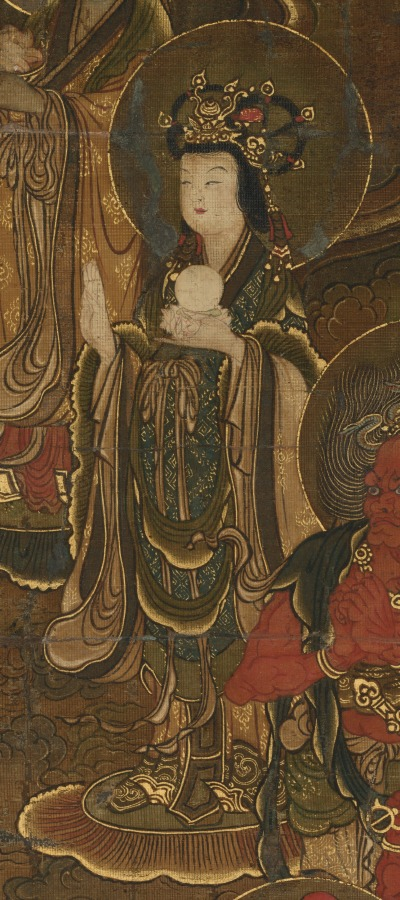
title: Descent of the Nine Luminaries and the Seven Stars at Kasuga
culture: Japan, Nanbokuchō period (1336–92)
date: mid- to late 1300s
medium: Hanging scroll; ink, color, gold and cut gold on silk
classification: Painting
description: This medieval religious painting shows celestial beings descending from the heavens into the Kasuga Shrine, a major religious site in Japan's ancient capital, Nara. The moon and the Kasuga mountain range appear in the uppermost portion of the painting, as does a red shrine entrance gate, or torii. In the upper part of the painting, figural representations of the stars in the constellation known as the Big Dipper in the West descend from right to left on cloud banks. In the lower part, the Nine Luminaries (Sanskrit: Navagraha) that emerged from the Vedic tradition—the sun and moon; the planets Jupiter, Mars, Saturn, Venus, and Mercury; and personifications of the fluctuating lunar nodes—descend in similar fashion. The painting uses the "deities in descent" scheme originating in China, as well as the original Buddhist form mandala (Japanese: honjibutsu mandarazu) format prevalent in medieval Japanese Shinto-Buddhist painting, to generate an image connected to the worship of celestial bodies in Esoteric Buddhism.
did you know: A 19th-century copy of this painting in ink and light color exists at the Kyoto City University of Arts.